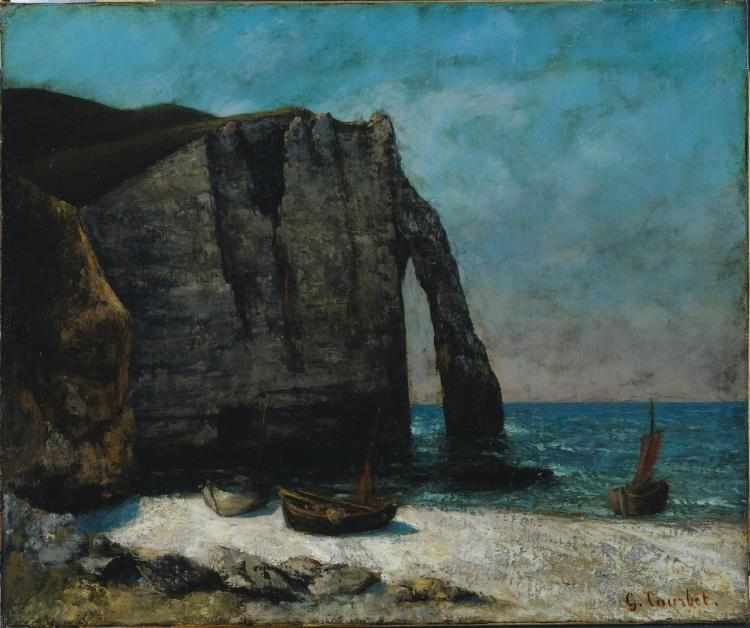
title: The Cliff at Étretat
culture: France, 19th century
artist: imitator of Gustave Courbet (French, 1819–1877)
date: after 1872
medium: oil on fabric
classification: Painting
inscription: Signed lower right: G. Courbet